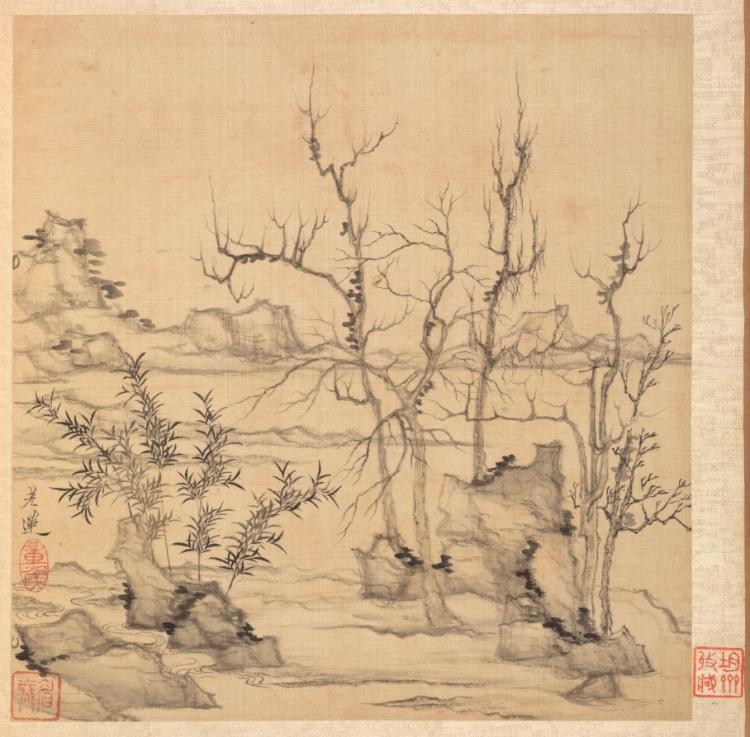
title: Paintings after Ancient Masters: Landscape in the Style of Ni Zan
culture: China, Ming dynasty (1368–1644)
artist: Chen Hongshou (Chinese, 1598/99–1652)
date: 1598–1652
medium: album leaf, ink and color on silk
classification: Painting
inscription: Lao-lien [Seal] Chang-hou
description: The twenty paintings in this double-album by Chen Hongshou include landscapes, figures, and flowers. It also has one leaf featuring a woman, an often-used subject not found in the other albums from the latter part of his career. His late works are wonderful summations of Chen's peculiar and quirky art--archaistic, hyper-refined--but without accompanying shallowness or sentimentality. His figures and landscapes in the late albums are miniaturized, not unlike the small Chinese gardens, or the carefully selected small table rocks or old roots used for contemplation to see the world in miniature. This loss of scale is quite deliberate and reflects the psychological situation of a depressed class like the Ming loyalist officials and scholars, deprived of their integrity and honor, and forced to lead a diminished and restricted existence.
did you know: Ni Zan (1301–1374) was known for his sparse, monochromatic ink landscape paintings.